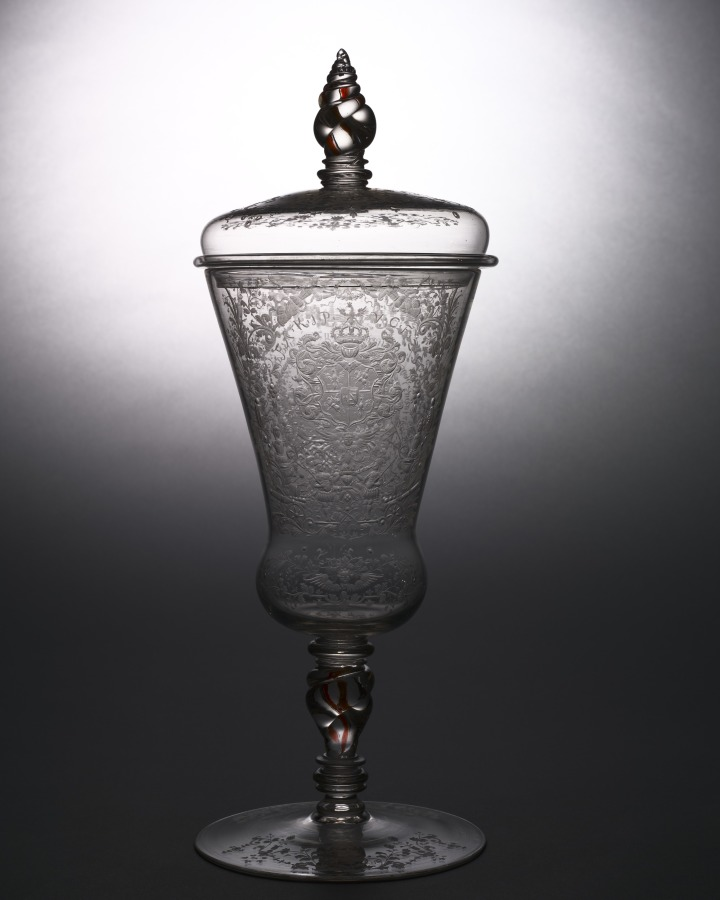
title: Standing Cup with Cover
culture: Bohemia, 18th century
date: c. 1715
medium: glass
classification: Glass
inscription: the German inscription engraved around the hunting scene translates as: When sorrow torments us enjoy a glass of wine and also the joy of a hunt; engraved on the opposite side: F.A.K.J.P.V.C.F.Z.S. (Friedrich August Keonig in Polen und Chur Fuerst zu Sachsen).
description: Engraved with arms of Saxony-Poland and Hunting Scene.